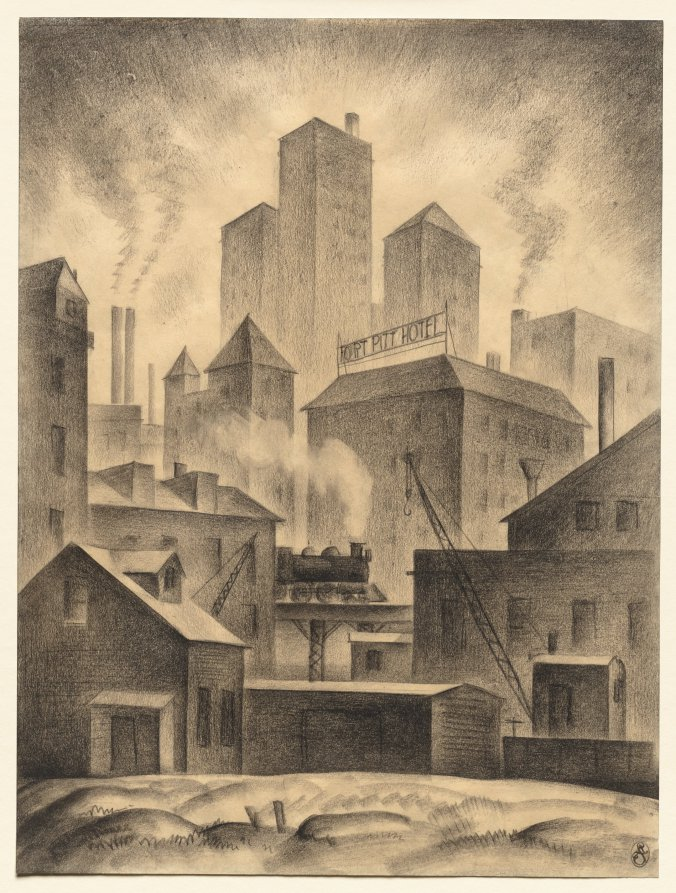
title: Harmonious Volumes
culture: America, Ohio, Cleveland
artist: Alpo S. Tuura (American, 1902–1928)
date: 1920s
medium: black crayon over traces of graphite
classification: Drawing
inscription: signed, lower right, in black ink: [artist stamp] (stamped by CMA after artist's death; see departmental card)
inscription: on verso, lower left, in graphite: 114